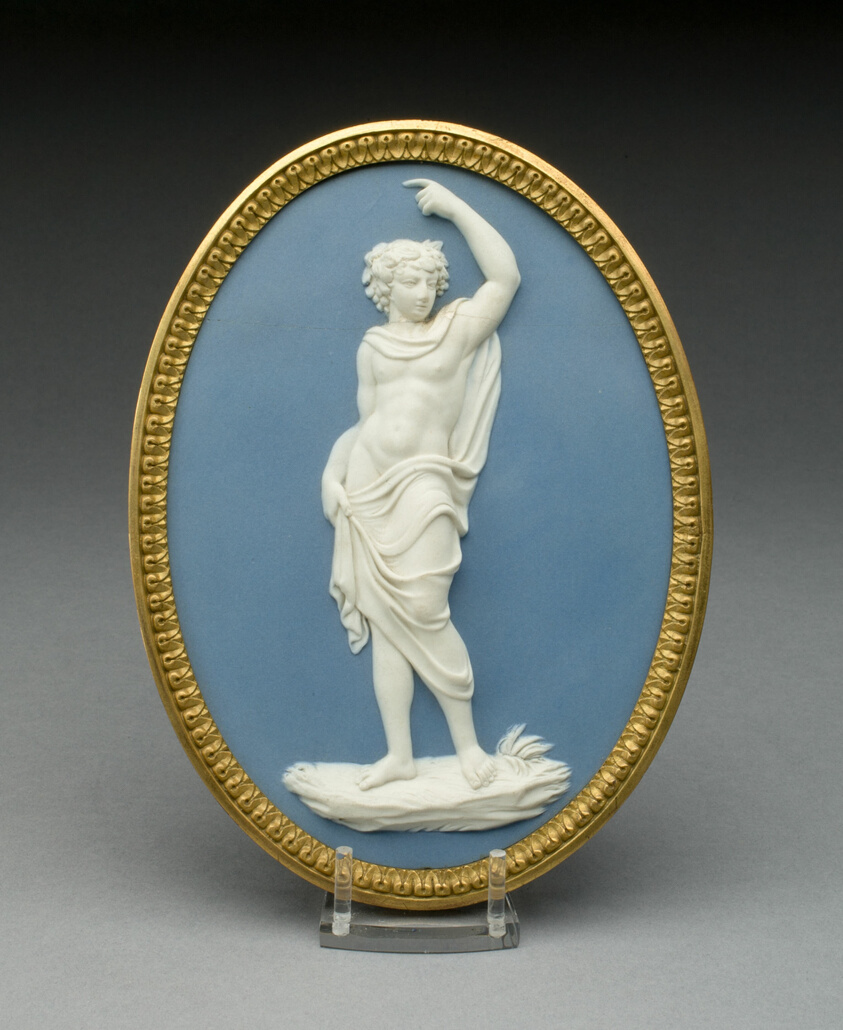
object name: Ceramics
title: Plaque with Bacchus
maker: Wedgwood Manufactory (England, founded 1759)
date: 1769/80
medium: Stoneware (jasperware)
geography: Burslem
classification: sculpture; stoneware; european decorative arts; ceramics